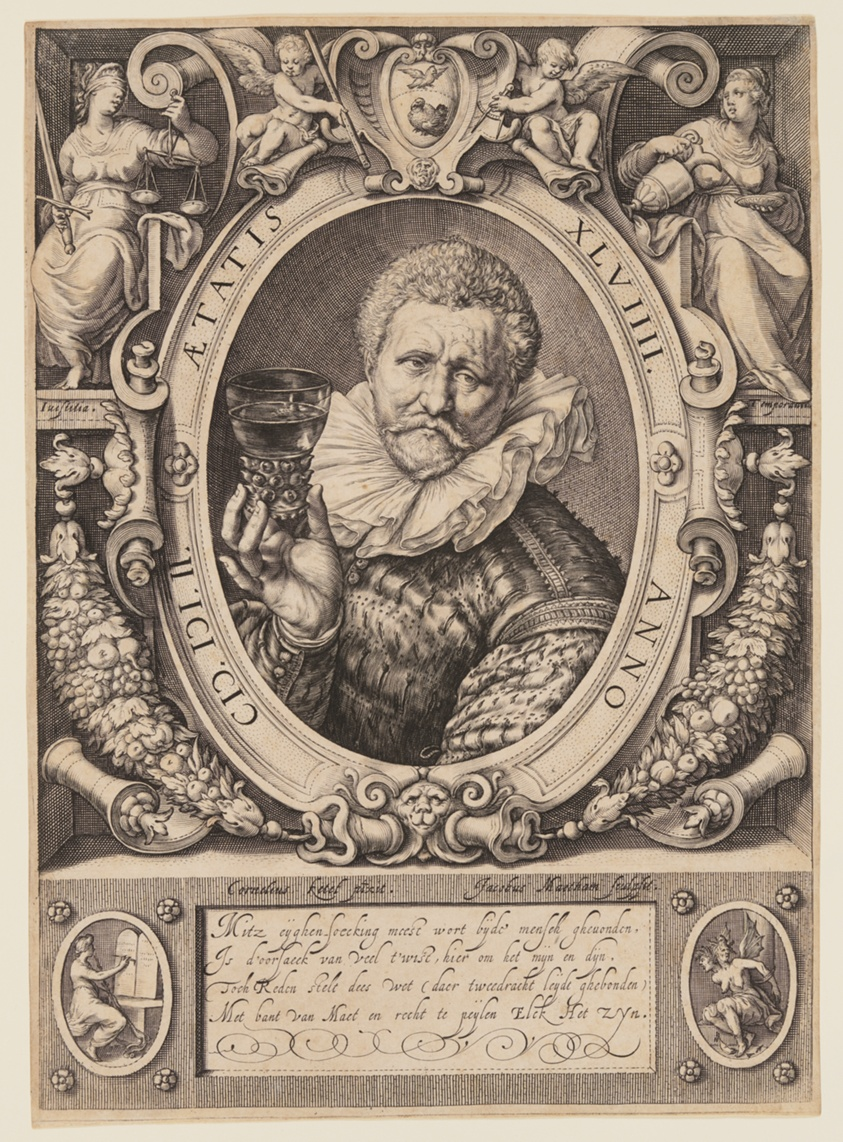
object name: Print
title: Vincent Jacobsz. Coster, wine merchant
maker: Jacob Matham (Dutch, 1571–1631); after Cornelis Ketel (Dutch, 1548-1616)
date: 1602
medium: Engraving on ivory laid paper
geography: Netherlands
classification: engraving; paper; print; prints and drawing